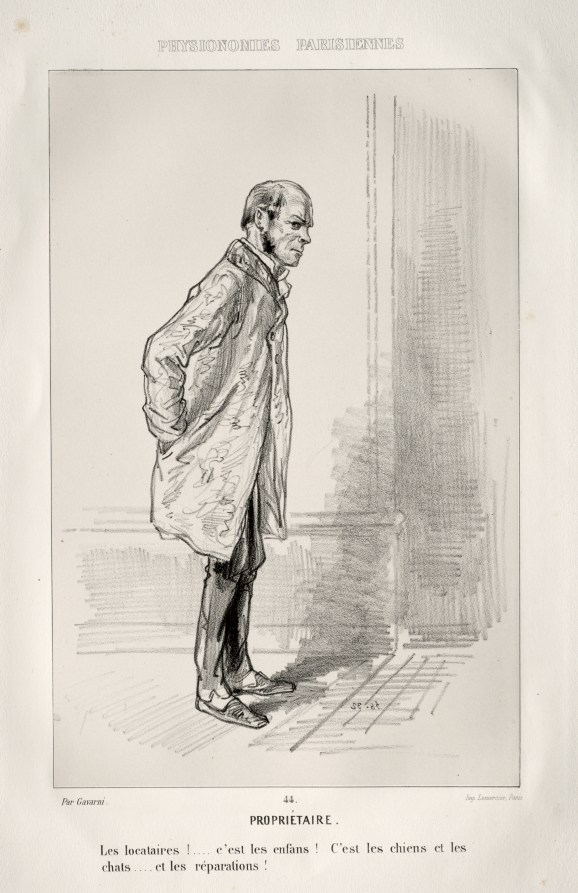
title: Propriétaire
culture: France, 19th century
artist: Paul Gavarni (French, 1804–1866)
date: c. 1858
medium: lithograph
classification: Print